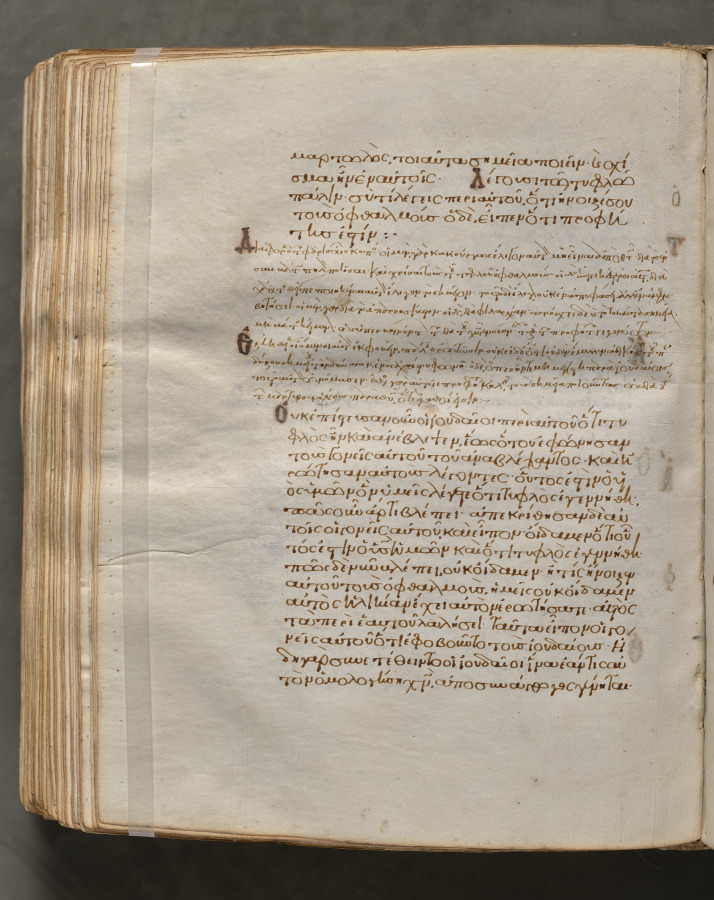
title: Text, folio 369 (verso), from a Gospel Book with Commentaries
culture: Byzantium, Constantinople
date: c. 1000–1100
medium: ink, tempera, and gold on vellum; leather binding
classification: Bound Volume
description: Each of the four gospels in this book opens on a page with brilliantly illuminated borders depicting the author of the text as well as birds—principally peacocks, symbols of the immortality of the soul—and fountains, representing the fountain of life and the salvation of the soul. This volume consists of 428 leaves with texts in Greek. Its level of sophistication suggests that it was probably written and decorated in a monastery in Constantinople.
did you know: Gospel books were carried in procession through Byzantine churches.